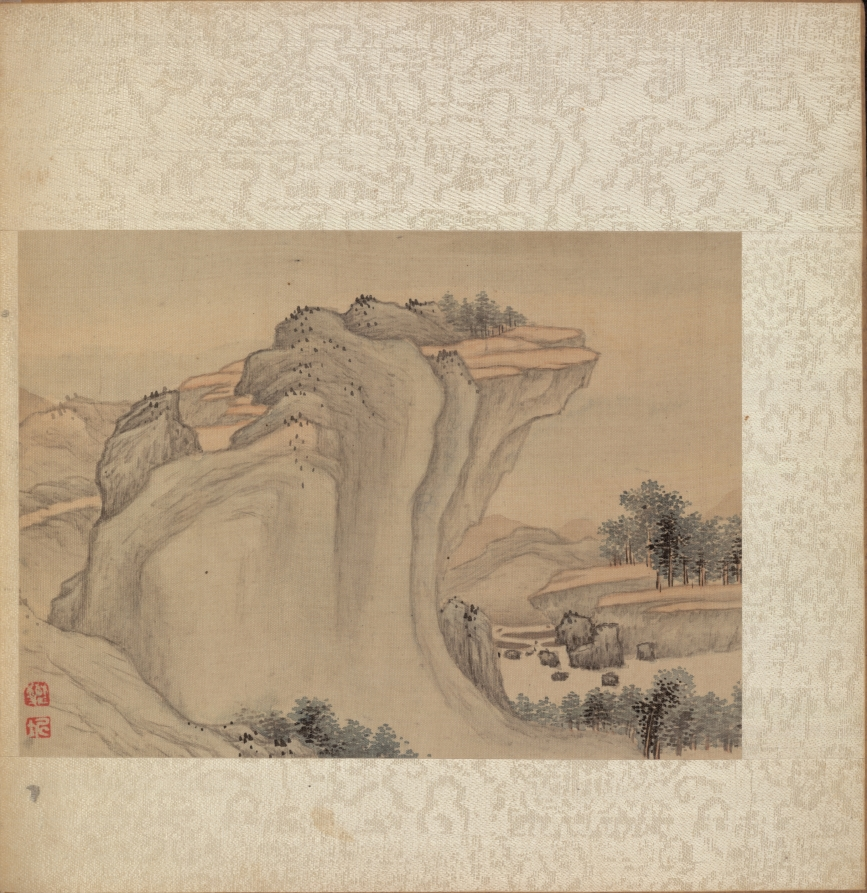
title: Album of Miscellaneous Subjects, Leaf 4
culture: China, Qing dynasty (1644-1911)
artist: Fan Qi (Chinese, 1616–after 1694)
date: early 1650s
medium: album leaf, ink and color on silk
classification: Painting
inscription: Artist seal: Fan Qi 樊圻. Poem by Xu Fang 徐枋 (1622–1694): By chance, I start my journey from the watershed to remote regions,/ Suddenly I sight the silhouette of mountains - myriad expanses of green./ What is this "Come-flying" Peak which now does not recede,/ Its rocky walls, linked to heaven, are drenched by a waterfall.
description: The fourth painting by Fan Qi alludes to Wang Wei's poetic lines: In empty hills, there is no one there; Yet one can hear the sound of conversation. The calligraphic colophon by Xu Fang adjacent to the painting reads: By chance, I start my journey from the watershed to remote regions, Suddenly I see the silhouette of mountains, myriad expanses of green. What is this Feilai Peak which now does not recede? Its rocky walls, linked to heaven, are drenched by a waterfall.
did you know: There is no sign of human presence in this sunny landscape dominated by a bold flat-topped cliff.